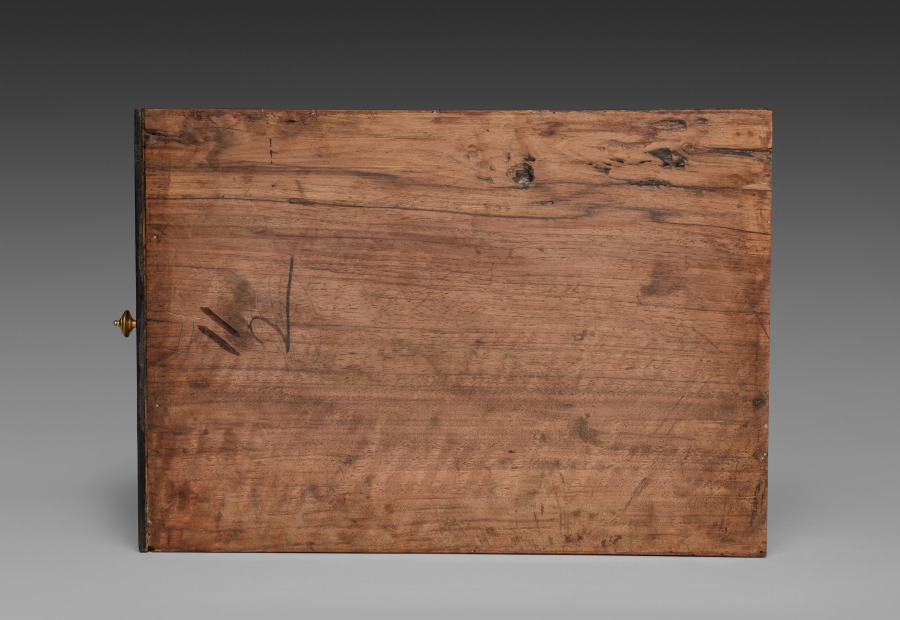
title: Interior Drawer for Cabinet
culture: France, late 17th Century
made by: André-Charles Boulle (French, 1642–1732)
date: c. 1690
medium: ebony, marquetry in metal and tortoise shell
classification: Furniture and woodwork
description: Appointed cabinetmaker to King Louis XIV in 1672, André-Charles Boulle became a master of furniture making in France during the late 1600s until his death in 1732. Known primarily for his use of marquetry, in which metal patterns are inlaid into tortoiseshell then applied within the veneered surface of the furniture, Boulle established a level of quality and craftsmanship few others could achieve. As a result, his work found favor at the royal court and among other aristocrats and diplomats eager to impress the king. The inclusion of a medallion depicting Louis XIV within the bronze decoration of this chest would have identified the owner with the royal court. Often exhibiting stout architectural proportions with elegant groups of inlaid motifs such as the parrot on the central panel of this chest, Boulle’s designs are an example of the intellectual fashion for contrasting ideas, materials, and motifs.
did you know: Originally designed to sit atop an elaborate tall stand, this chest was likely altered in the late 1700s to reduce its scale and height.